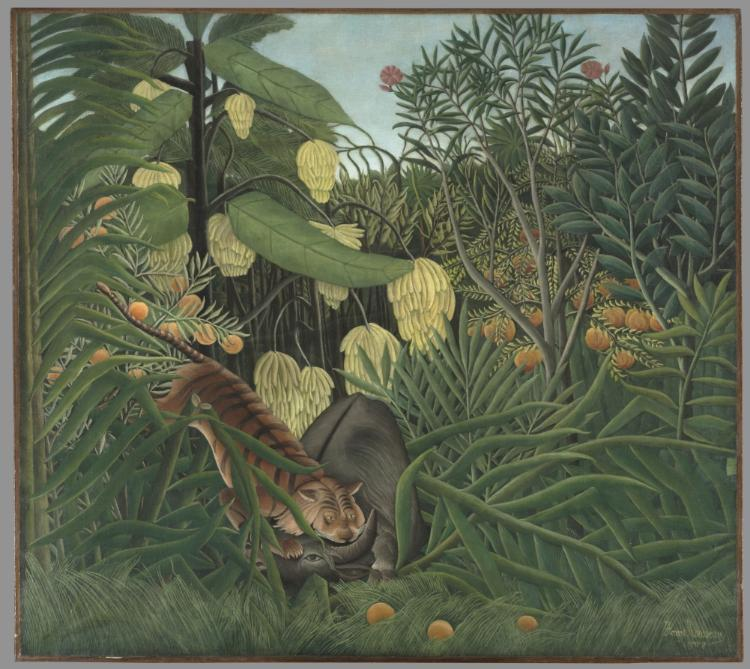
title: Fight Between a Tiger and a Buffalo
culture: France, late 19th-early 20th Century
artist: Henri Rousseau (French, 1844–1910)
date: 1908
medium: oil on fabric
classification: Painting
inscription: Signed and dated lower right: Henri Rousseau / 1908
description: Having never ventured outside France, Henri Rousseau derived his jungle scenes from reading travel books and visiting the Paris botanical garden. He placed this imaginary scene of a tiger attacking a buffalo within a fantastic jungle environment in which botanical accuracy was of little importance (note the bananas growing upside down). Here, sharply outlined hothouse plants are enlarged to fearsome proportions. Rousseau was working on this painting while imprisoned for fraud in December 1907. Officials granted him an early release to finish it for exhibition at the Salon des Indépendants, where this major composition, one of the artist's largest and most important, appeared in March 1908. A self-taught artist and retired customs inspector, Rousseau was admired by Pablo Picasso and other avant-garde artists for his originality and the naïve purity of his vision.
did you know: Many of Henri Rousseau's paintings depict wild animals and tropical jungles that might lead one to believe he traveled widely. However, Rousseau never left France, but drew inspiration from visiting botanical gardens and reading travel books.